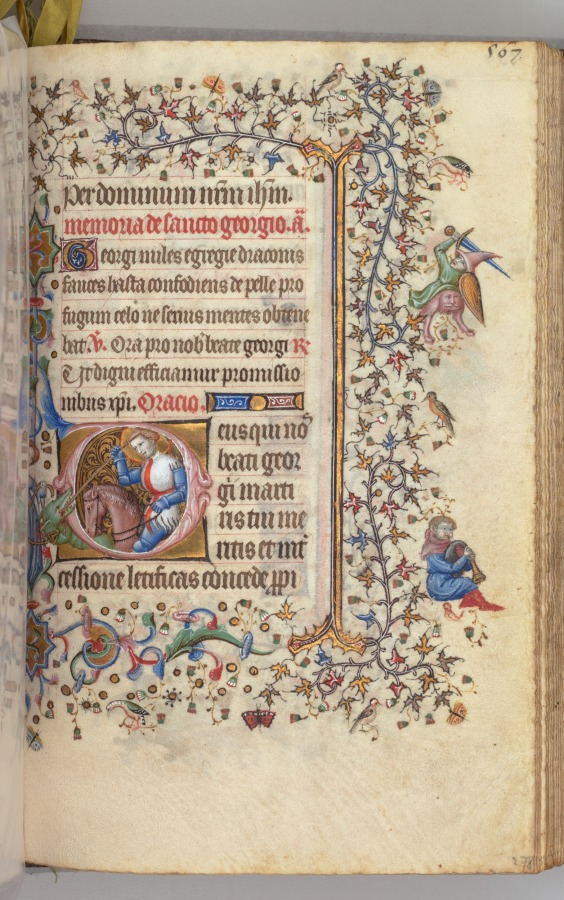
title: Hours of Charles the Noble, King of Navarre (1361-1425): fol. 278r, St. George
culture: France, Paris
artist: Master of the Brussels Initials and Associates (French)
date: c. 1405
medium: ink, tempera, and gold on vellum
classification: Bound Volume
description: This precious volume was obviously highly prized by its owner, the French-born King of Navarre, who had his coat of arms painted on no less than twenty folios. Rather than directly commissioning this manuscript from a specific workshop, it seems that Charles the Noble acquired his book of hours -- perhaps ready-made for the luxury market -- while on a trip to Paris in 1404-05. A collaborative effort, six painting styles are evidenced within the pages of this codex, those of two Italians, two Frenchmen, and two Netherlanders. The painter who was responsible for the planning and decoration of the book, and who produced seventeen of the large miniatures, was a Bolognese artist known as the Master of the Brussels Initials. His principal assistant, responsible for most of the borders, was a Florentine who signed his name "Zecho" da Firenze on folio 208 verso.